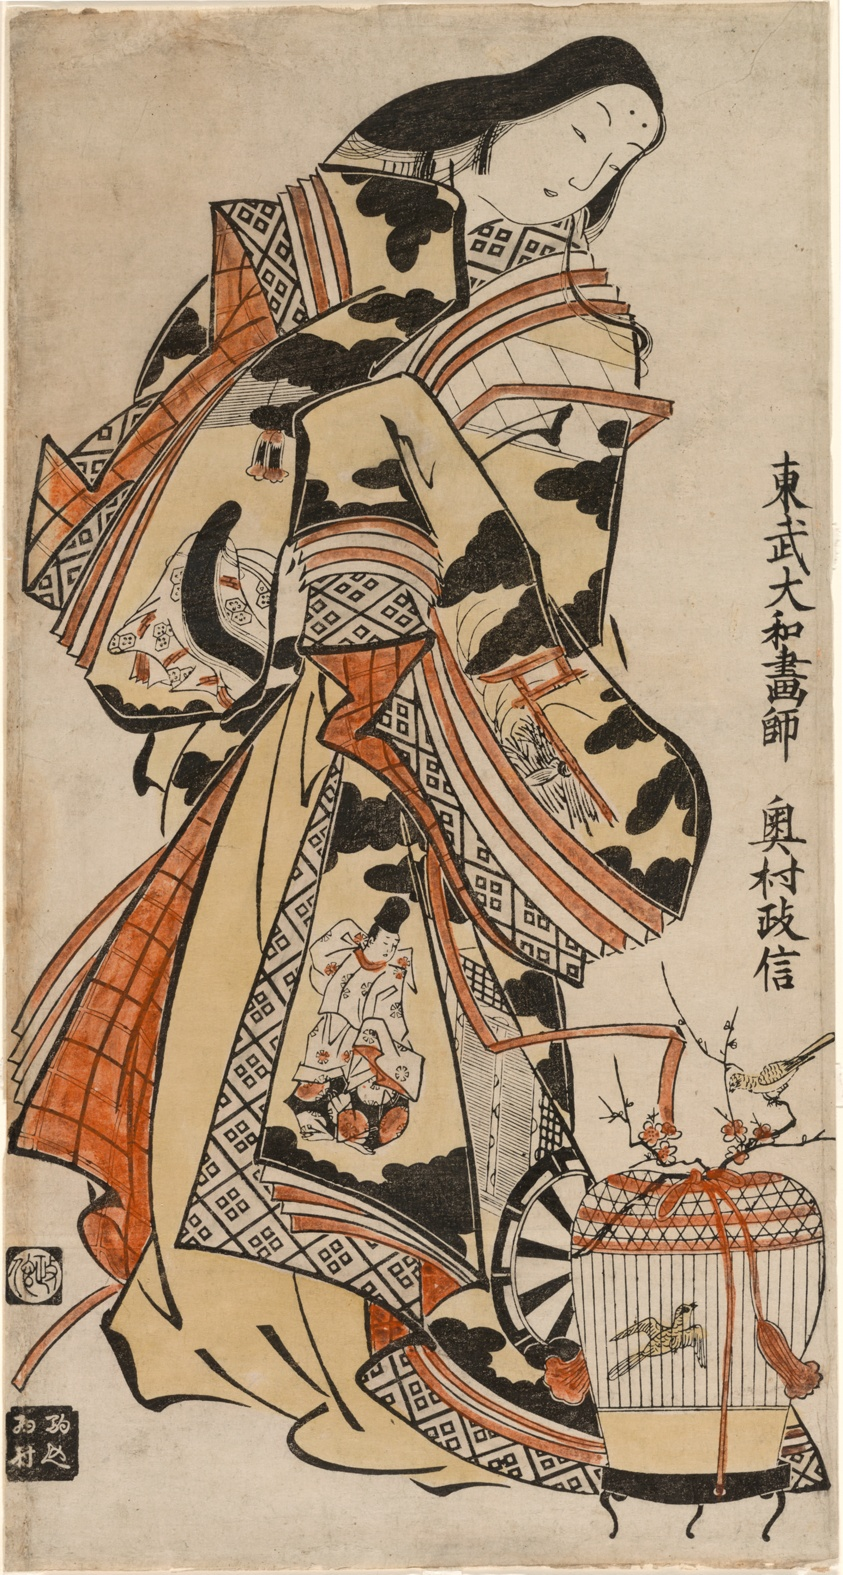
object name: Print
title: An Elegant Lady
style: Japanese (culture or style)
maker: Okumura Masanobu (Japanese, 1686-1764)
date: c. 1715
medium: Hand-colored woodblock print; vertical o-oban, tan-e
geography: Japan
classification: woodblock print; print; asian art